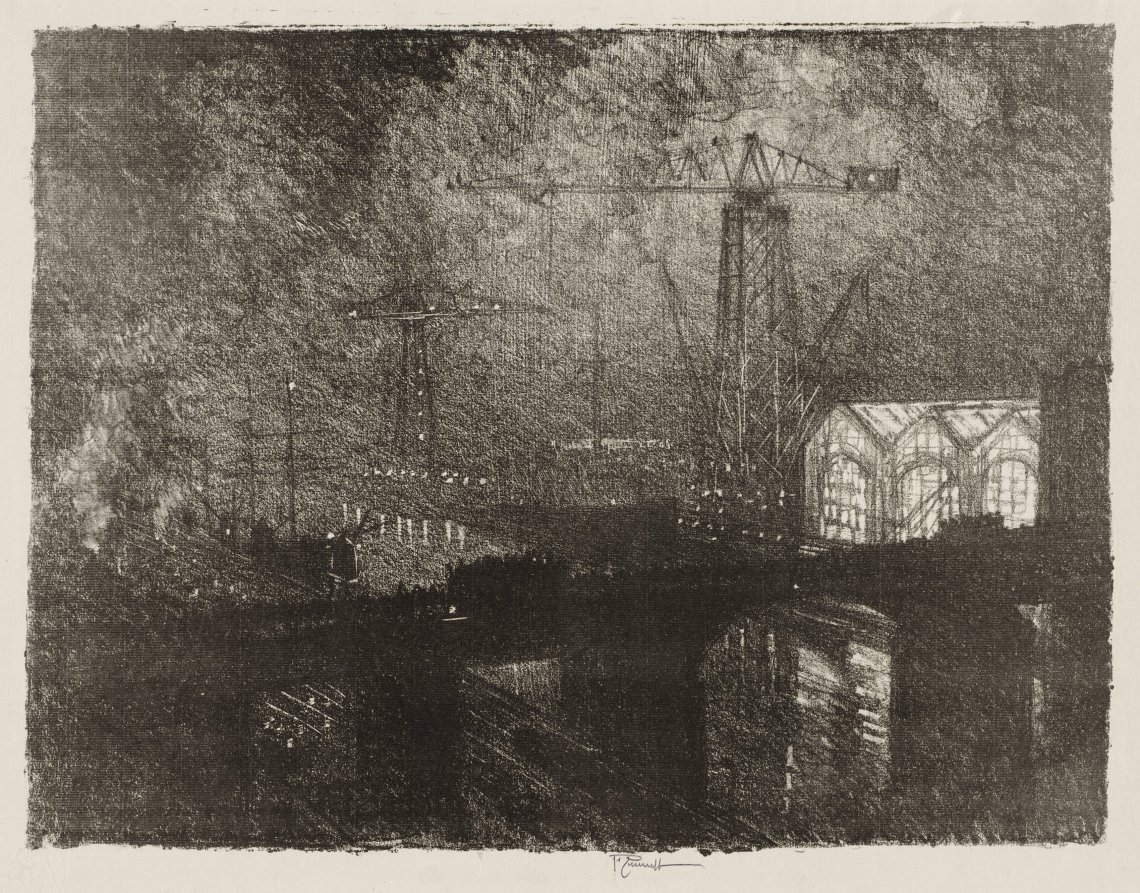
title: English War Work: The Shops at Night, Changing Shifts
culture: America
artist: Joseph Pennell (American, 1857–1926)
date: 1916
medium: lithograph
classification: Print